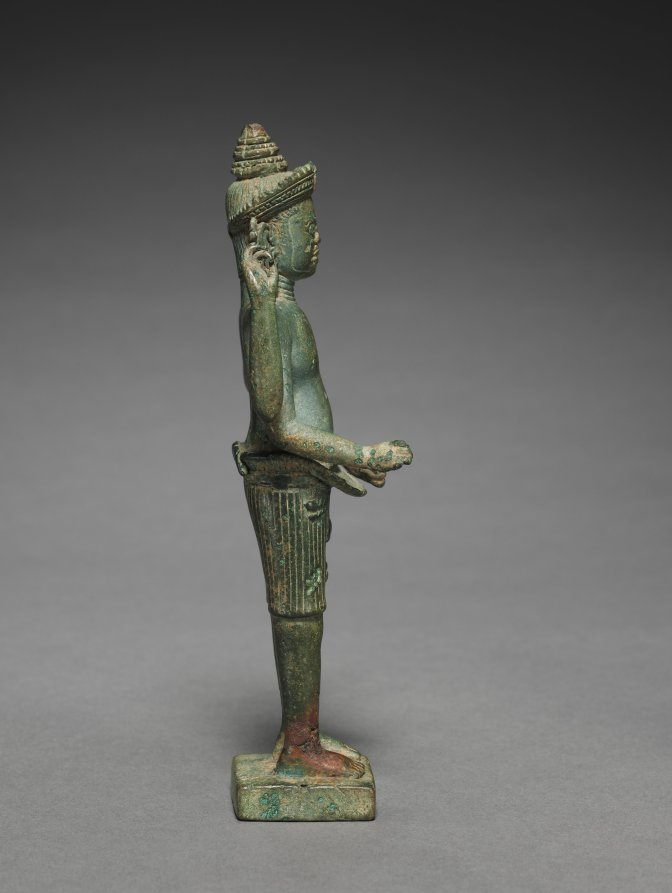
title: Standing Ashura with Four Arms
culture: Cambodia, Koh Ker style, 2nd quarter of 10th Century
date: 925–950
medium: bronze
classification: Sculpture